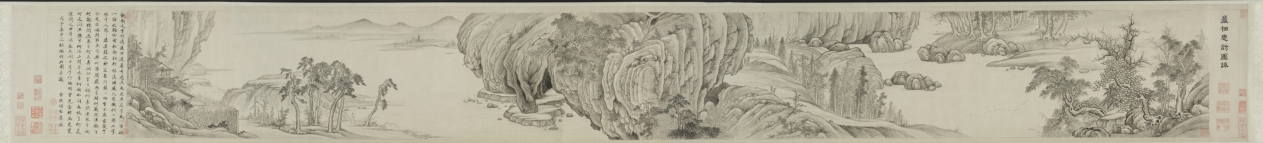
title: Meditative Visit to a Mountain Retreat: In Picture and in Words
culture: China, Ming dynasty (1368–1644)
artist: Xiang Shengmo (Chinese, 1597–1658)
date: 1648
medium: handscroll; ink on paper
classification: Painting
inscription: Artist's title and 3 seals (in front of painting): [title] Meditative Visit to a Mountain Retreat: In Picture and in Words 巖栖思訪圖詠 [3 seals] Tian lai ge zhong wen sun 天籟閣中文孫; Xiang shi kong zhang zui xin han mo 項氏孔彰醉心翰墨; Qing fu yuan zhong di yi miao ye 清福緣中第一妙業.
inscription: [印] 兔烏叟; 考古正今. 觀斯人兮何逍遙，非逍遙兮思其友。 思其友兮天一方，欲一訪之難回首。 松耶柏耶稱後凋，巖穴霏微何二酉。 山兮水兮人悠悠，遠莫致之神交否？ 河關一向望不及，言笑于今更非偶。 問游魚兮樂何深？問飛鳥兮歸何藪？ 問猿鶴兮何親疎？問鹿豕兮何夭壽？ 問白雲兮從何來？問流泉兮向何走？ 問漁樵兮何江山？問草木兮何畝畎？ 問春秋兮何炎涼？問世人兮何長久？ 問日月兮何晦明？曾見當時烏兔叟？ 戊子嘉平之初偶作此圖并題。 胥樵項聖謩識。 [印] 兔烏叟; 項氏孔彰; 未喪斯文.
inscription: 13 additional seals: 4 of Tang Zuomei 唐作梅 (late 18th–19th century); 3 of Zhang Baixi 張百熙 (1847–1907); 4 of Zhang Heng 張珩 (1915–1963); 2 unidentified.